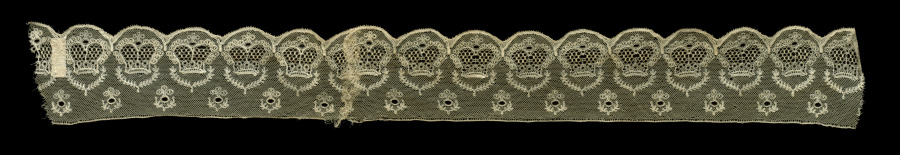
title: Lace with design known as "Crown Derby"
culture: England, Bedfordshire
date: 1800s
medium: Bobbin lace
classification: Lace